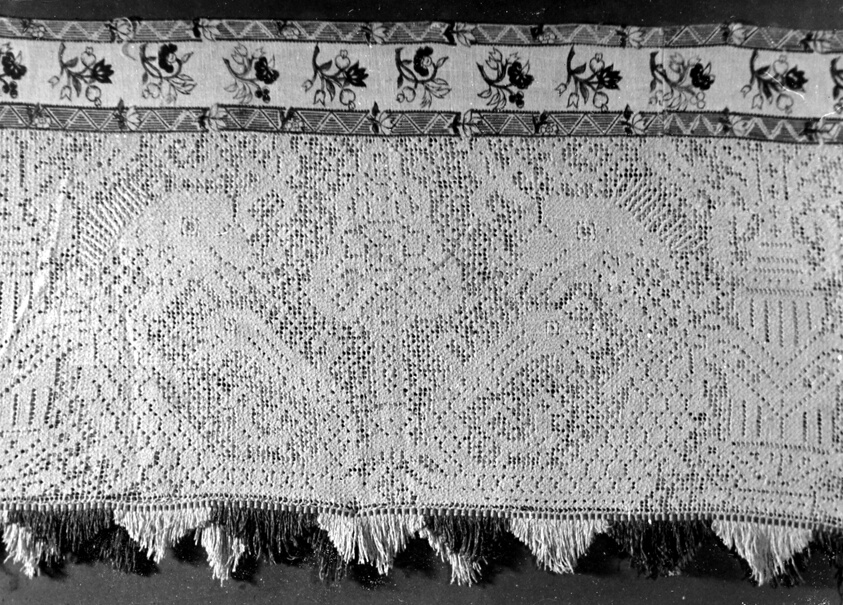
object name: Textile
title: Border or Valance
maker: Italy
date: 17th century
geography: Italy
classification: textile; needlework (visual works); lace